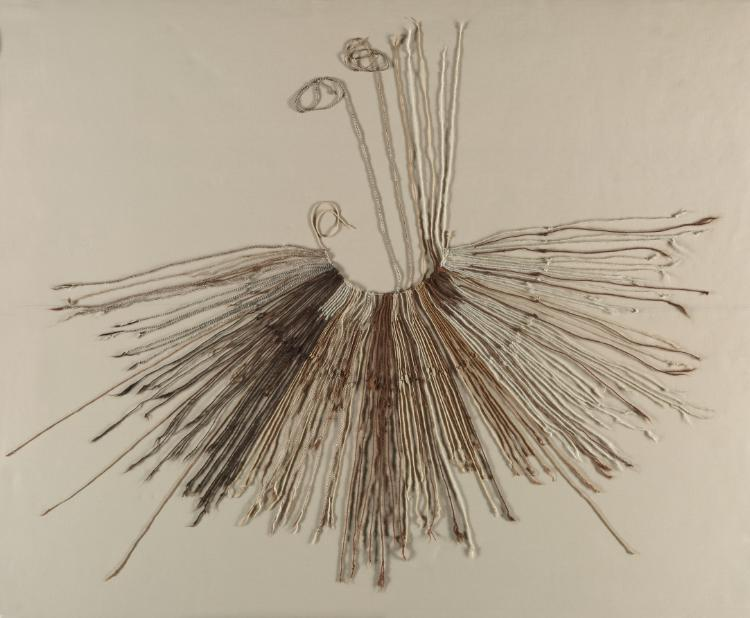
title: Inka Khipu (Fiber Recording Device)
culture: Peru, Inca Period, 15th-16th Century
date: c. 1400–1532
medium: cords, knotted and twisted; cotton and wool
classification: Miscellaneous